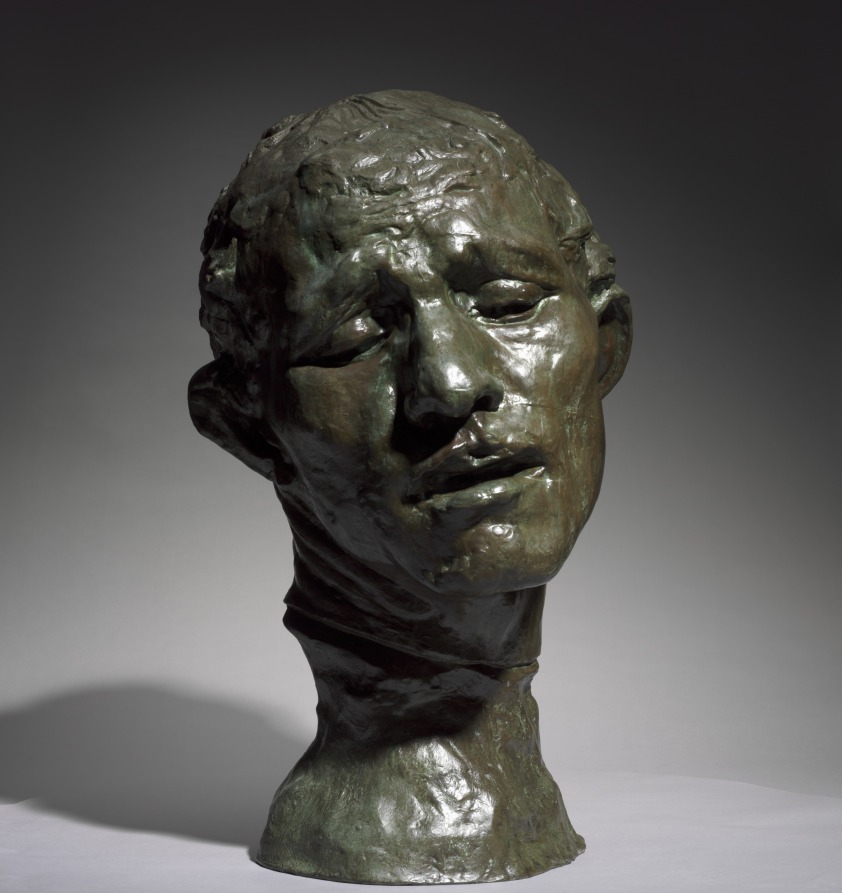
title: Heroic Head of Pierre de Wissant, One of the Burghers of Calais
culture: France, 19th century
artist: Auguste Rodin (French, 1840–1917)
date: 1886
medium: bronze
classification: Sculpture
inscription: inscribed at neck, left: A.Rodin; inscribed lower back: Alexis Rudier/Fondeur-Paris.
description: This sculpture depicts one of the figures in Rodin’s large public monument The Burghers of Calais (1884–89), featuring six French men who volunteered to be taken prisoner by the English in exchange for lifting the siege of Calais during the Hundred Years War (1337–1453). Pierre de Wissant’s anguished expression suggests extreme mental suffering as he contemplates his expected execution. Rodin exhibited a life-size version of the figure as an independent work before completing the monument. He later made multiple versions in various sizes and media.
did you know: This sculpture depicts the head of a figure from Rodin's large public monument The Burghers of Calais (1884-89). The CMA also owns a plaster version of the head.